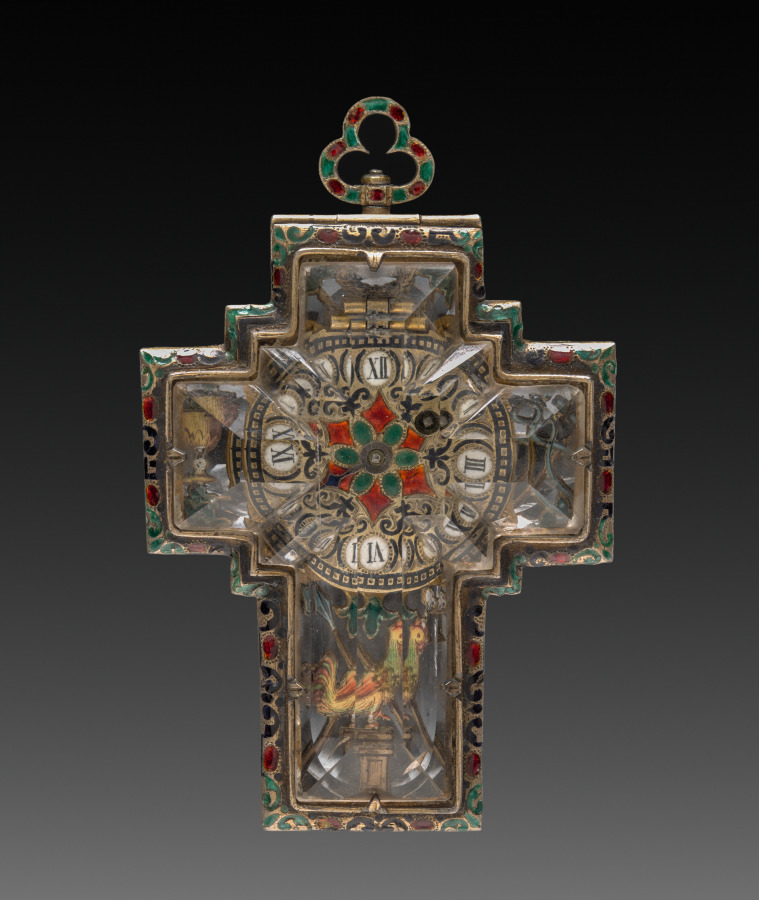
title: Watch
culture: Austria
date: 1800s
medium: crystal, gilt metal, enamel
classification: Jewelry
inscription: movement inscribed in ligature: "Ranna a Vienne."